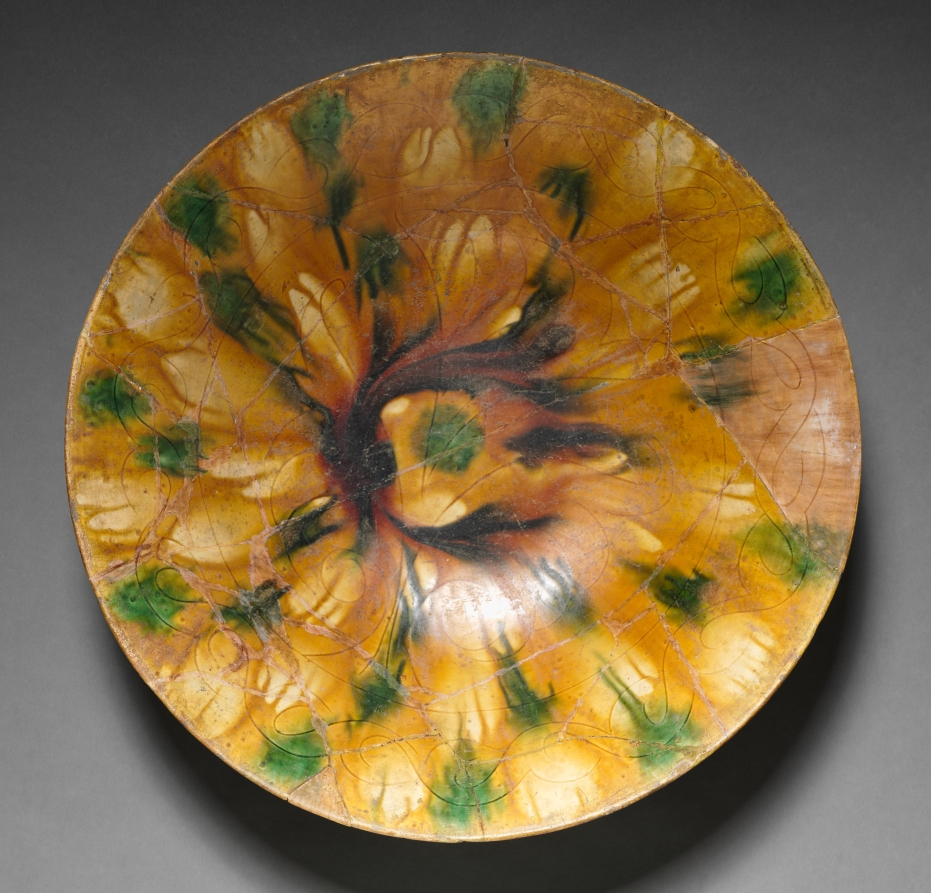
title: Bowl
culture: Iraq or Iran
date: 800s–900s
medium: earthenware with painted underglaze and incised design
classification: Ceramic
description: This large bowl with flaring sides is splashed with yellow, brown, and green pigments, which have run during the firing process, in imitation of Tang Chinese ceramics.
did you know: Look closely: the bowl has incised decoration of a large palmette in the center and a split-leaf scroll pattern just inside the rim.